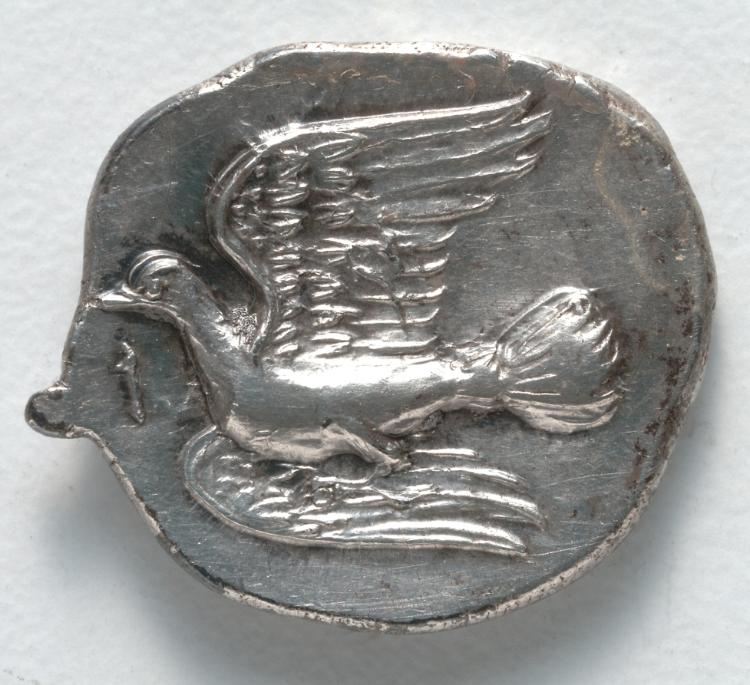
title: Hemidrachm: Dove (reverse)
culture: Greek, minted at Sikyon (Peloponnesos)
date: 400–323 BCE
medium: silver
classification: Coins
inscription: I